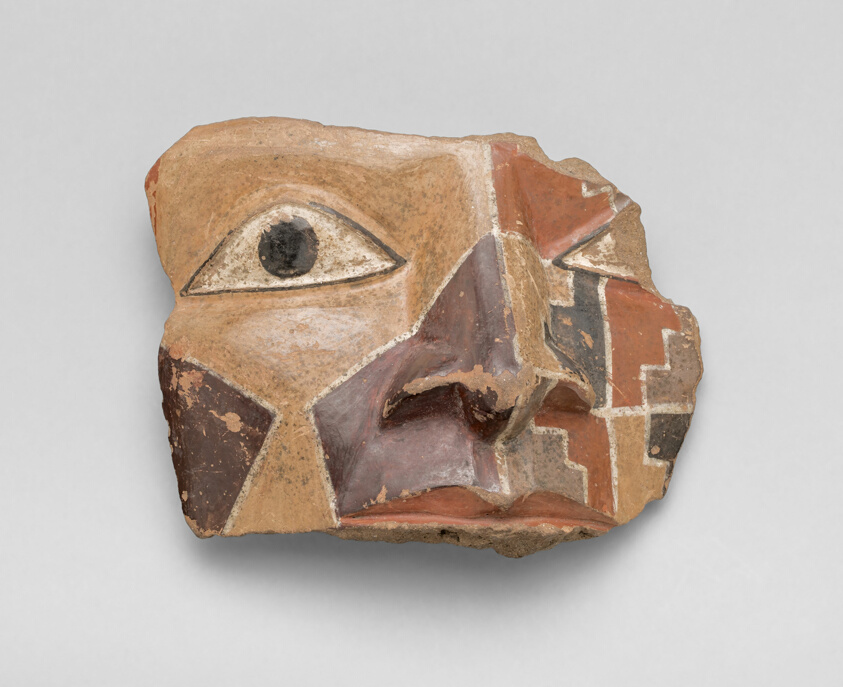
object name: Vessel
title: Head Fragment from a Large Ceremonial Jar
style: tiahuanaco, middle horizon, Pre-Columbian, americas, huari, andes, Arts of the Americas, andean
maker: Tiwanaku-Wari; Pacheco, south coast, Peru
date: 700–800 CE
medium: Ceramic and pigment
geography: Pacheco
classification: earthenware; ceramics; fragment; vessel; art of the americas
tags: people, faces